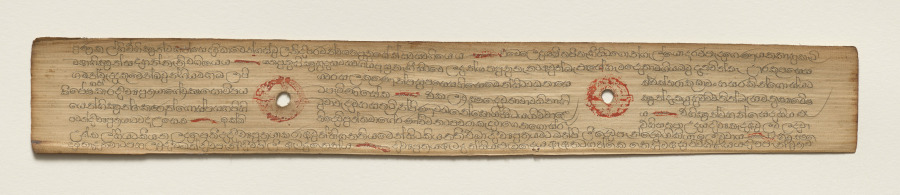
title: Leaf from a Buddhist Manuscript (verso)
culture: Sri Lanka, Singhalese, Late 17th century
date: c. 1700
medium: fiber paper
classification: Manuscript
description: Palm leaf material is still used for manuscripts in Sri Lanka. The palm leaves are prepared first by boiling them, drying them in the sun, and then rubbing them with oils. Scribes then use a metal stylus to incise the text. Then charcoal powder is wiped across the pages, filling in only the inscribed lines.